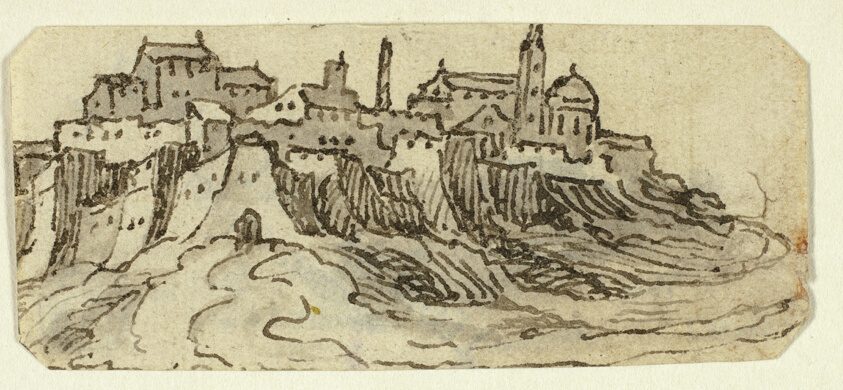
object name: Drawing and Watercolor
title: View of Hill Town with Cathedral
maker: Unknown Artist; Flemish, 17th century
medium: Pen and brown ink with brush and brown wash on cream laid paper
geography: Flanders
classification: pen and ink drawings; drawings (visual works); prints and drawing